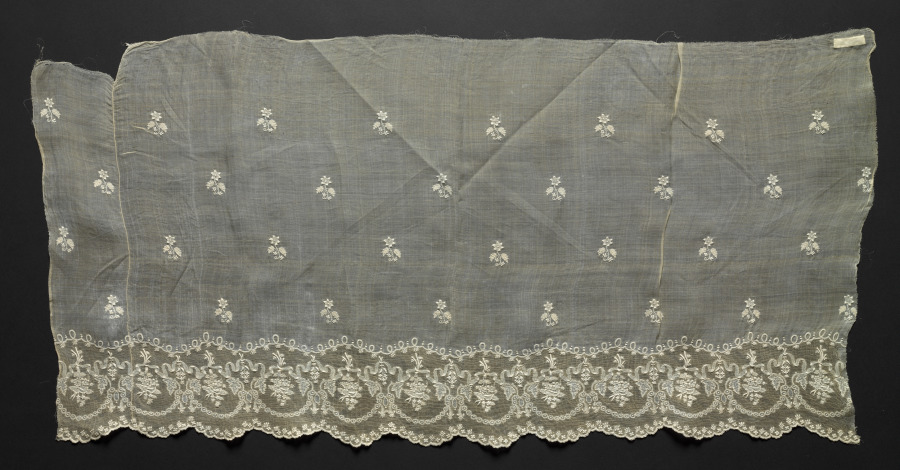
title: Blouse in four pieces (sleeve)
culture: Philippines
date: 1800s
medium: Plain weave piña; needle lace (drawnwork) and white cotton embroidery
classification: Embroidery